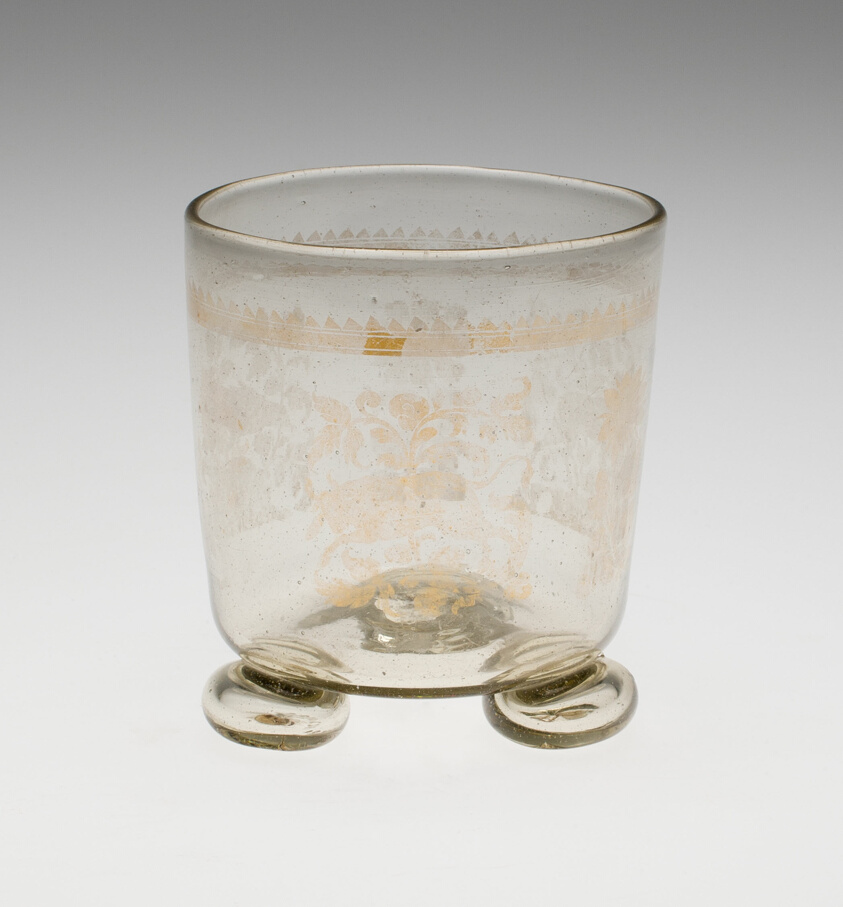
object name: Glass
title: Beaker with Feet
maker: Germany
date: Late 17th century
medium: Glass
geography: Germany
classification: glass; european decorative arts